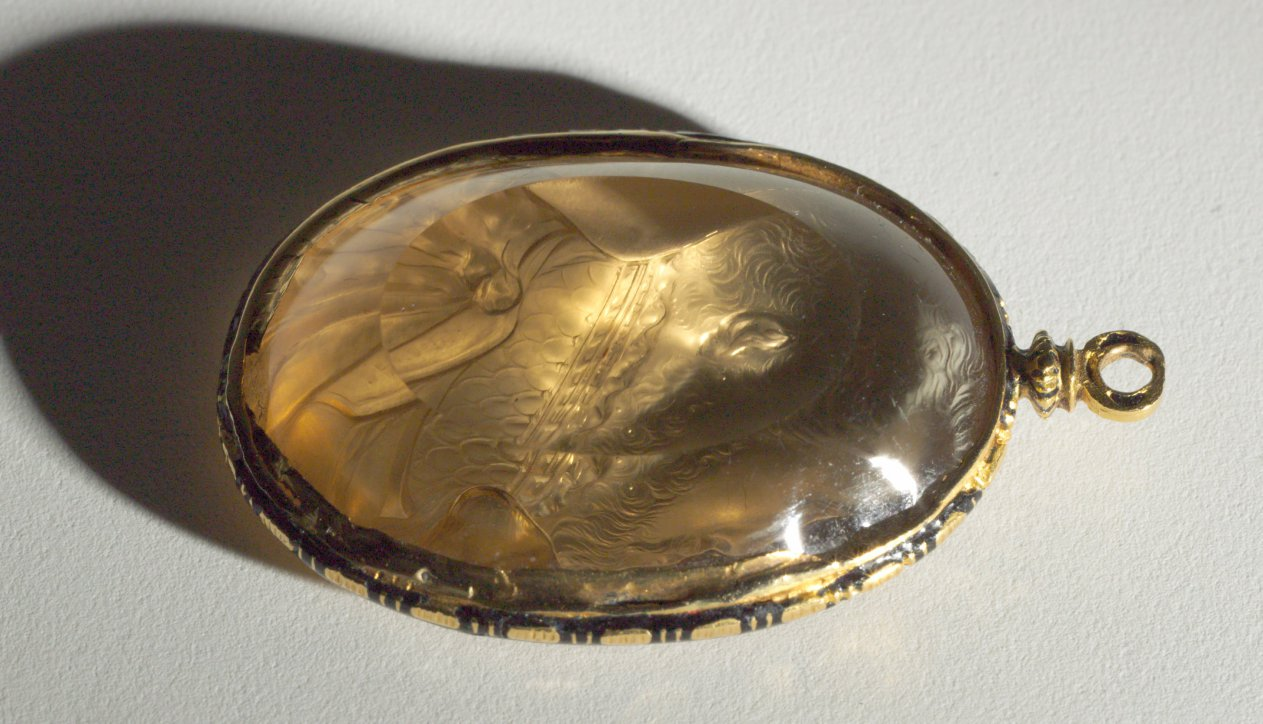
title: Portrait of Philip II, King of Spain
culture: Italy, 16th century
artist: Alessandro Cesati (Italian, before 1538-after 1564)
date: mid-1550s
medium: citrine, mounted in a gold and enamel pendant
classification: Sculpture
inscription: Signed on collar .A.E. (Likely abbreviation for “ΑΛΕΞΑΝΔΡΟΣ ΕΠΟΙΕΙ”, or “Alexandros Epoiei,” which translates to “Alexander made [me / this].”)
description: Clad in armor, Philip II wears a chain with the Order of Golden Fleece around his neck. The remarkably precise and varied cutting describes the textures of cloth, metal, skin, and hair while presenting the king’s features with striking naturalism—complete with receding hairline and prominent chin—as well as conveying his forceful character. Carved gems were luxury arts of the highest order in the Renaissance, hotly collected and used as diplomatic gifts. The original patron is not yet known, but cameos played a prominent role at the Spanish court, where the royal family often hold gems of Philip II in their portraits. The yellow quartz, rare in the 1500s, probably came from a newly opened source in South America; this object is thus both a natural marvel and a masterful portrait. One of only three known works signed by the artist (his initials appear at miniscule scale on the collar just below the knot of cloth), this stone is also likely in its original setting.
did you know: The ancient Romans believed citrine, a type of quartz, offered protection against evil thoughts.